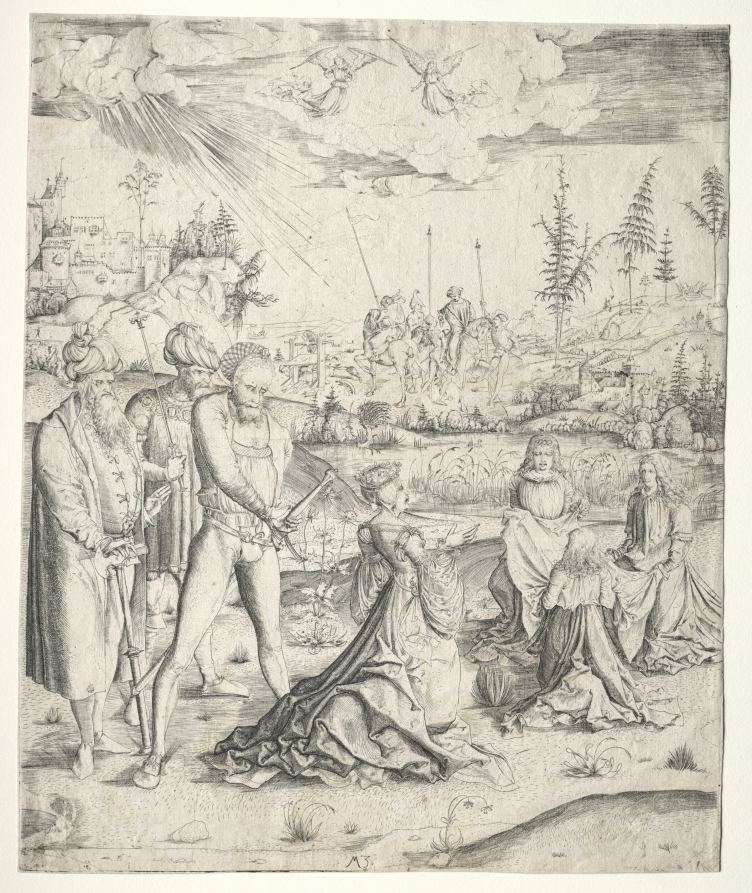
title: The Martyrdom of St. Catherine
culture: Germany, early 16th Century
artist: Master MZ (German)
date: 1500–03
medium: engraving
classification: Print